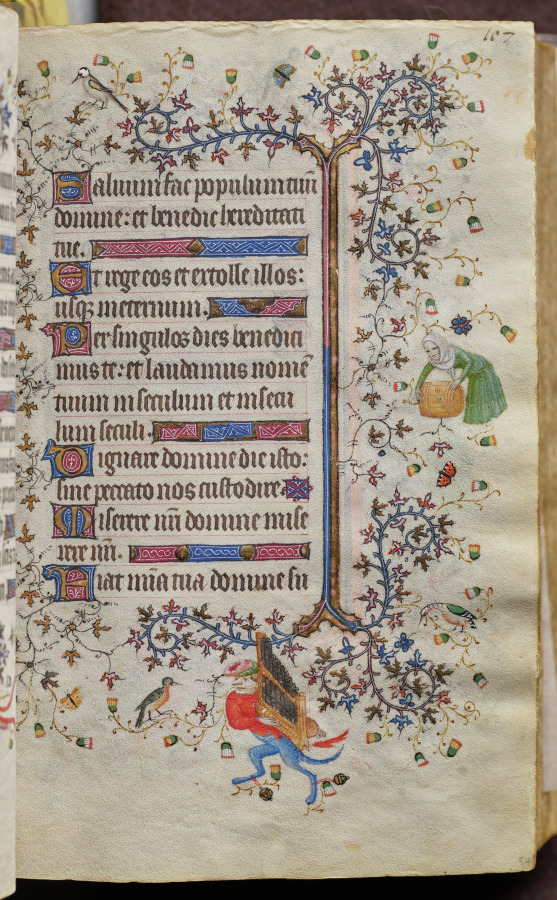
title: Hours of Charles the Noble, King of Navarre (1361-1425): fol. 54r, Text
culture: France, Paris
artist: Master of the Brussels Initials and Associates (French)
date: c. 1405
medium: ink, tempera, and gold on vellum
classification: Bound Volume